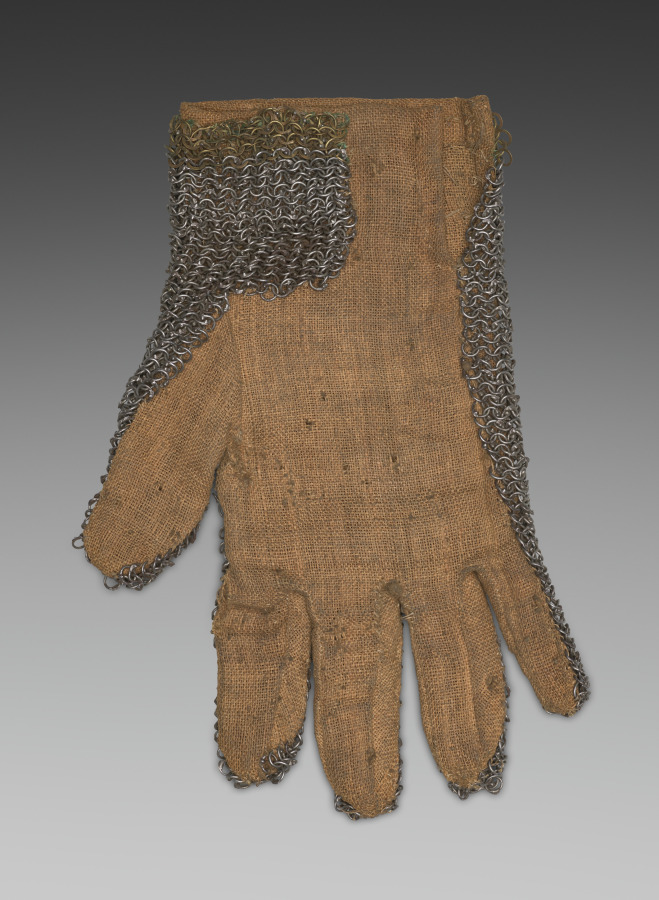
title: Gauntlet of Mail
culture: England, 16th century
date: 1500s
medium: steel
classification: Arms and Armor